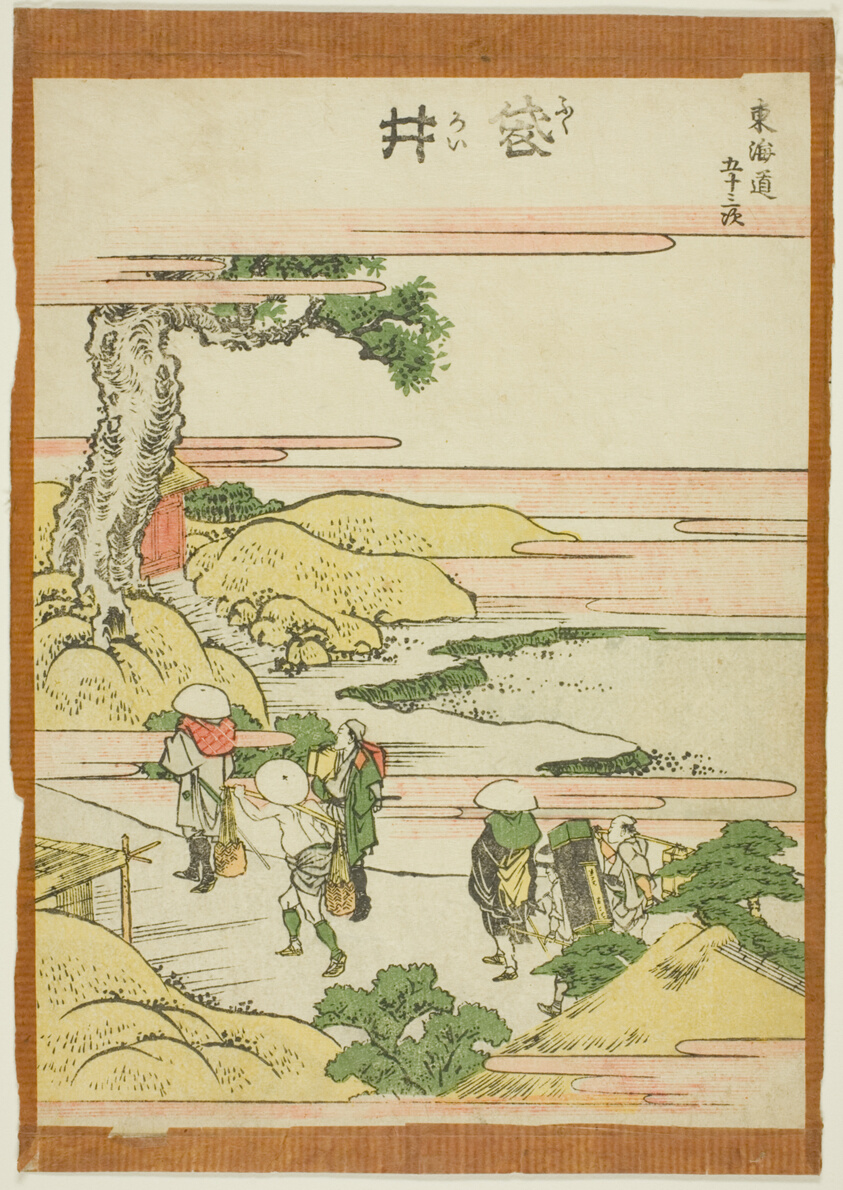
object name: Print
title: Fukoroi, from the series "Fifty-three Stations of the Tokaido (Tokaido gojusan tsugi)"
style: Japanese (culture or style)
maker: Katsushika Hokusai 葛飾 北斎; Japanese, 1760-1849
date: c. 1806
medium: Color woodblock print; chuban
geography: Japan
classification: woodblock print; print; asian art